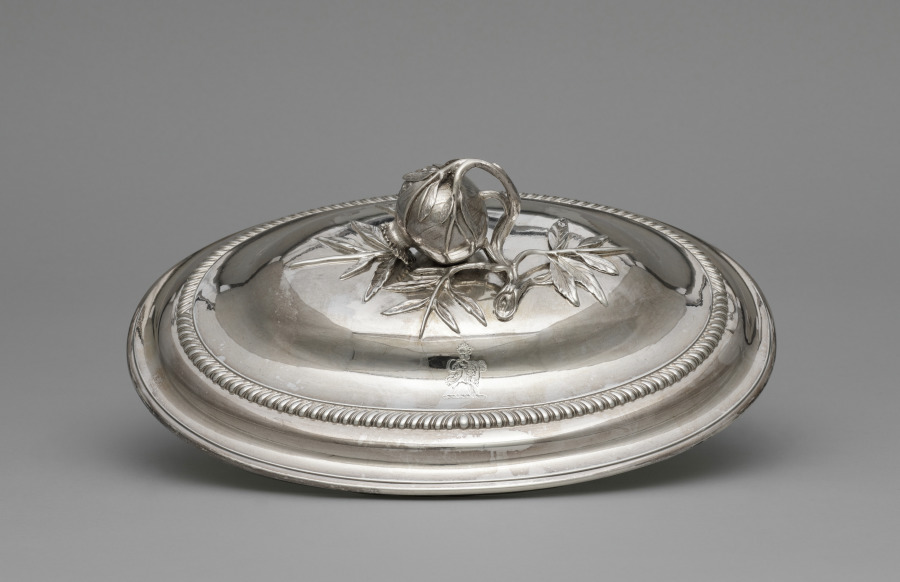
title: Cover for a Tureen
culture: England, 18th century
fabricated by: Edward Wakelin (British, 1784)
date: 1753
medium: silver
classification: Silver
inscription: engraved coat of arms of Admiral Edward Vernon of Nacton (1684-1757) and his wife Sarah, daughter of Thomas Best. Engraved on cover is Vernon crest, a woman holding a scythe.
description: A very successful silversmith, Edward Wakelin may have been more a businessman than a craftsman or designer.